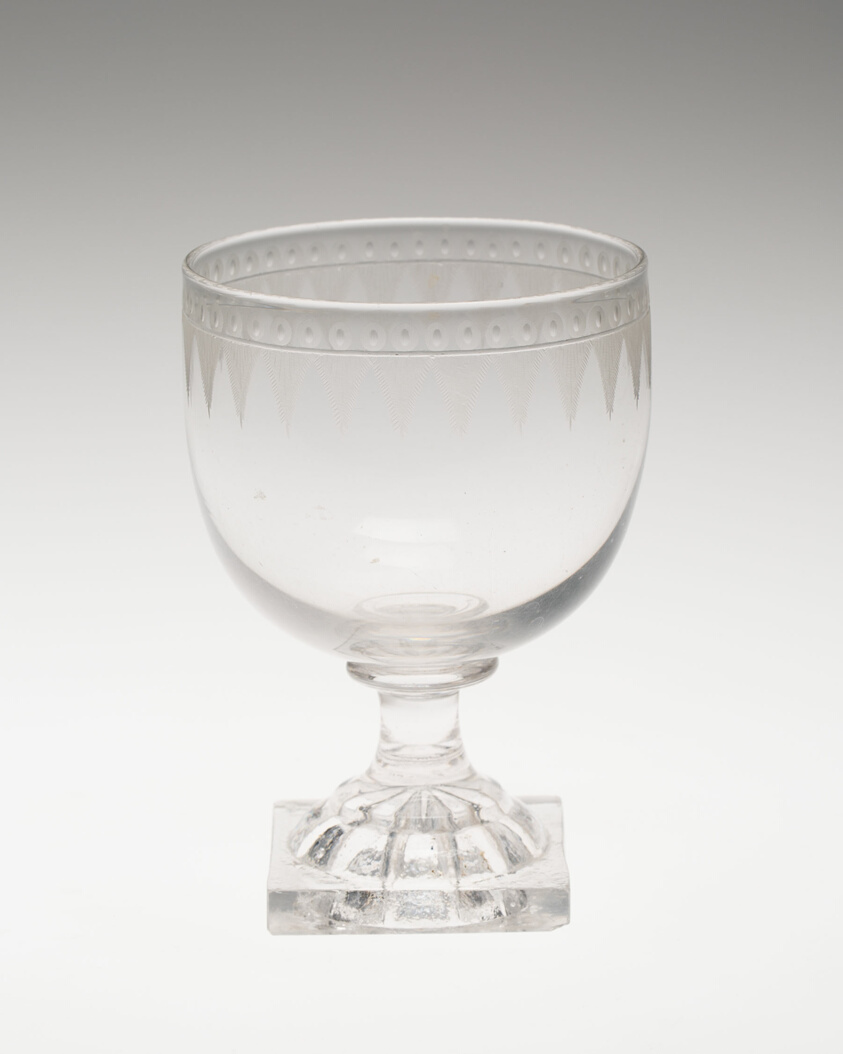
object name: Glass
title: Rummer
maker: England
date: c. 1800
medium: Glass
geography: England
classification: glass